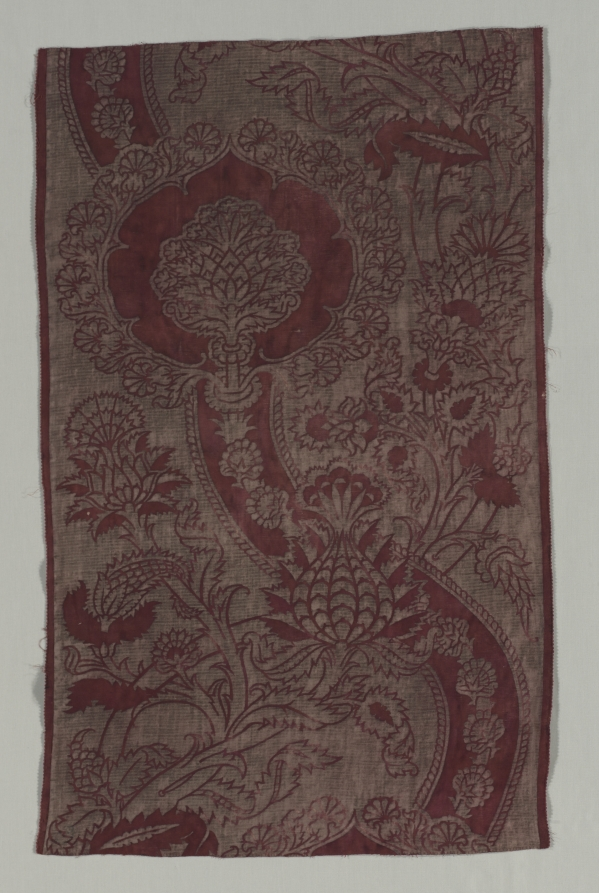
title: Reproduction of a Florentine Velvet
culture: Italy, Venice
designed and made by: Mariano Fortuny y Madrazo (Spanish, 1871–1949)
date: c. 1937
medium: cotton, printed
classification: Textile